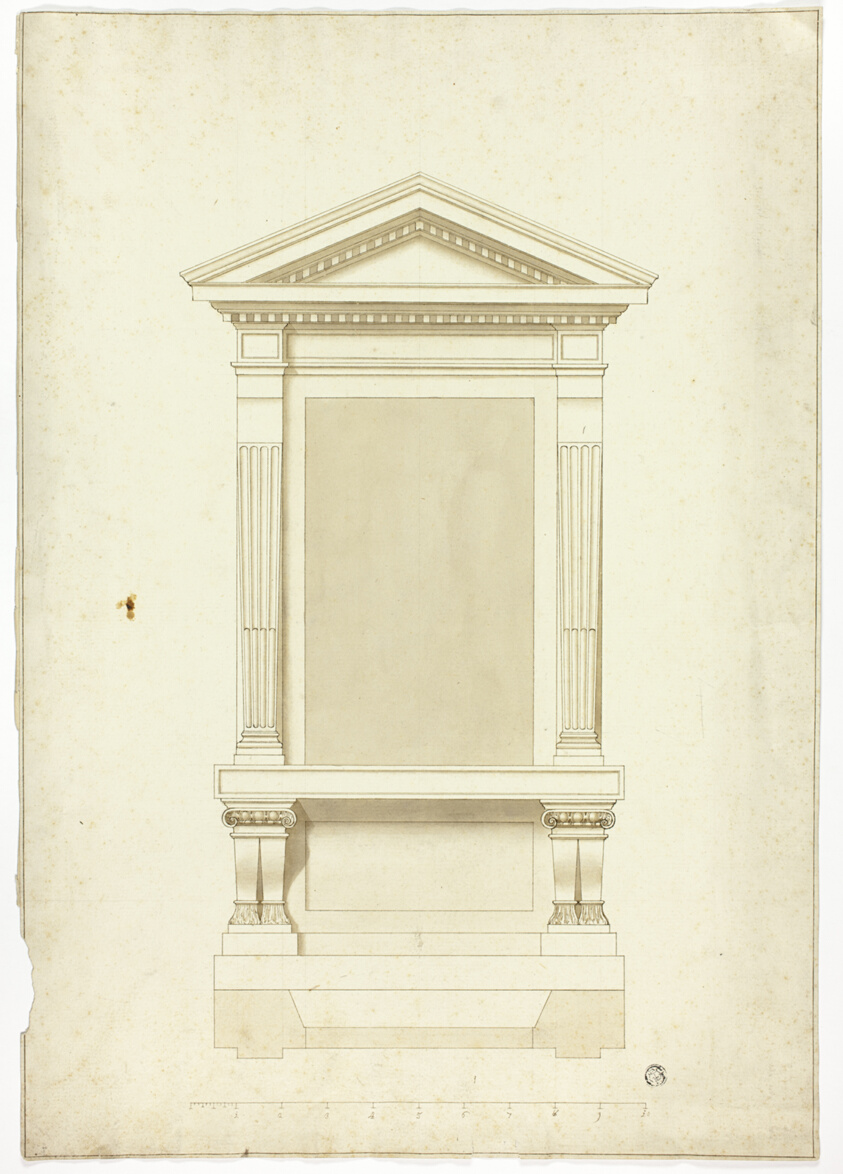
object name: Drawing and Watercolor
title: Side Altar or Wall Tomb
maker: Unknown Artist; Dutch, possibly 18th century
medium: Pen and brown ink and brush and brown wash, over traces of graphite, on cream laid paper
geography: Holland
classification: pen and ink drawings; paper; brush and wash; drawings (visual works); prints and drawing